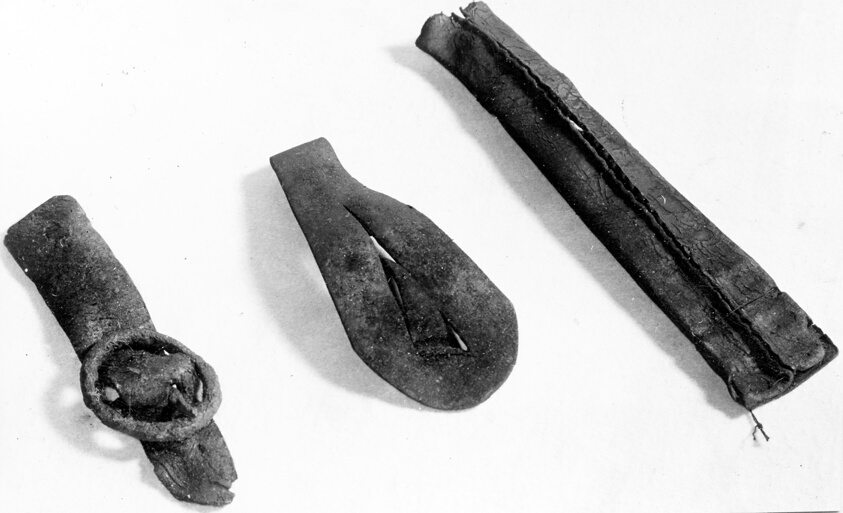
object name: Textile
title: Parts of a Belts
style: elizabethan, tudor, european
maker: England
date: 16th century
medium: Leather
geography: England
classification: textile; costume accessory